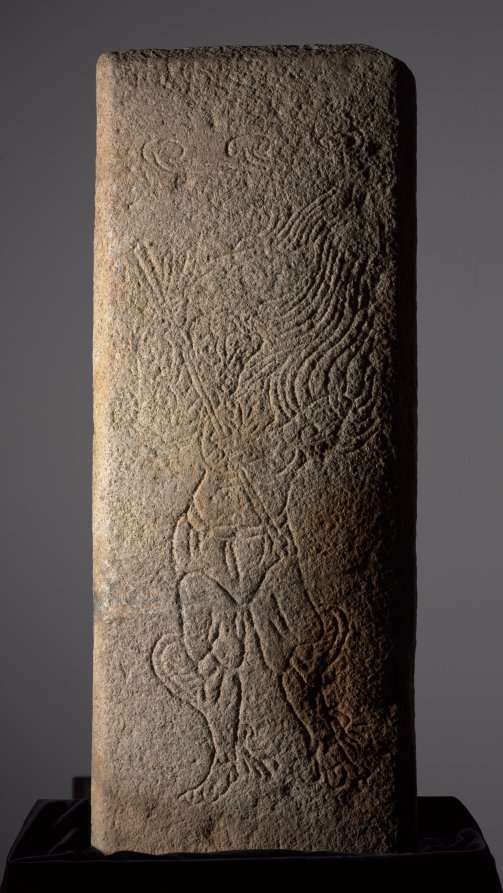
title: Stone Panel for Royal Tomb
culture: Korea, Unified Silla period (676-935)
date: late 700s-early 800s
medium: granite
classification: Sculpture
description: This panel shows a figure with a human body and the features of a rat, which is one of the signs of the Asian zodiac, and is likely one of 12 granite panels from a royal tomb. It is probably from Gyeongju—the capital of the kingdoms of the Silla (57 BCE–668) and Unified Silla (688–935) periods—where large royal tomb mounds can still be found. This panel resembles those showing the animal signs of the Korean zodiac from the tomb of General Kim Yusin (595–673) in Gyeongju, the most famous tomb of the period.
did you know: A rat, one of the signs of the East Asian zodiac, carved in this stone panel symbolizes wealth.